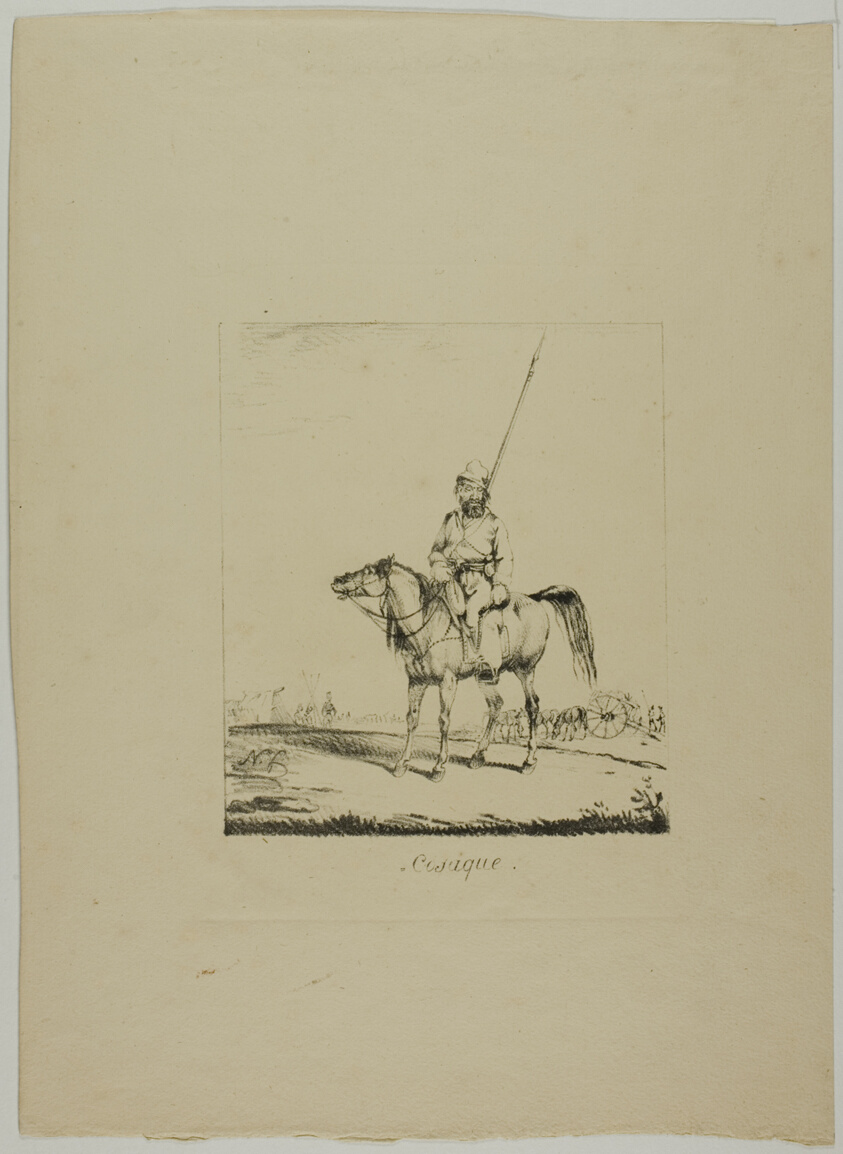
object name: Print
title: A Cossack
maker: Monogrammist N.D. (possibly French, 18th-19th century)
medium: Lithograph in black on tan wove paper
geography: France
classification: lithograph; print; prints and drawing